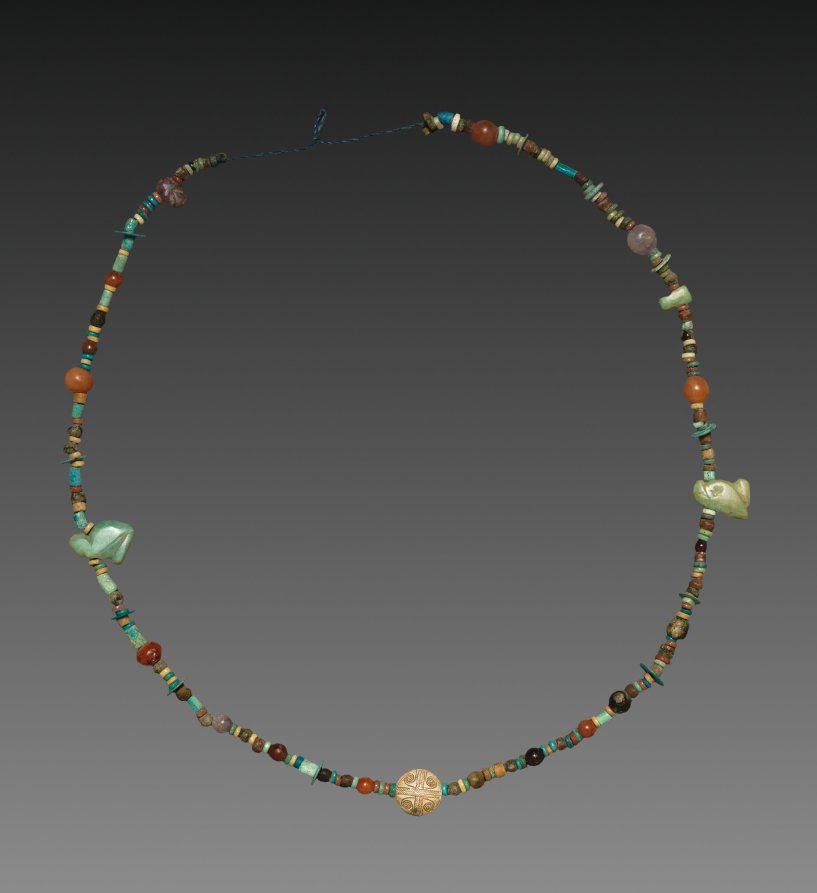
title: Necklace with Amulets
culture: Egypt, Middle Kingdom (2040–1648 BCE), Dynasty 12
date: 1980–1801 BCE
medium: faience and various stones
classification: Jewelry